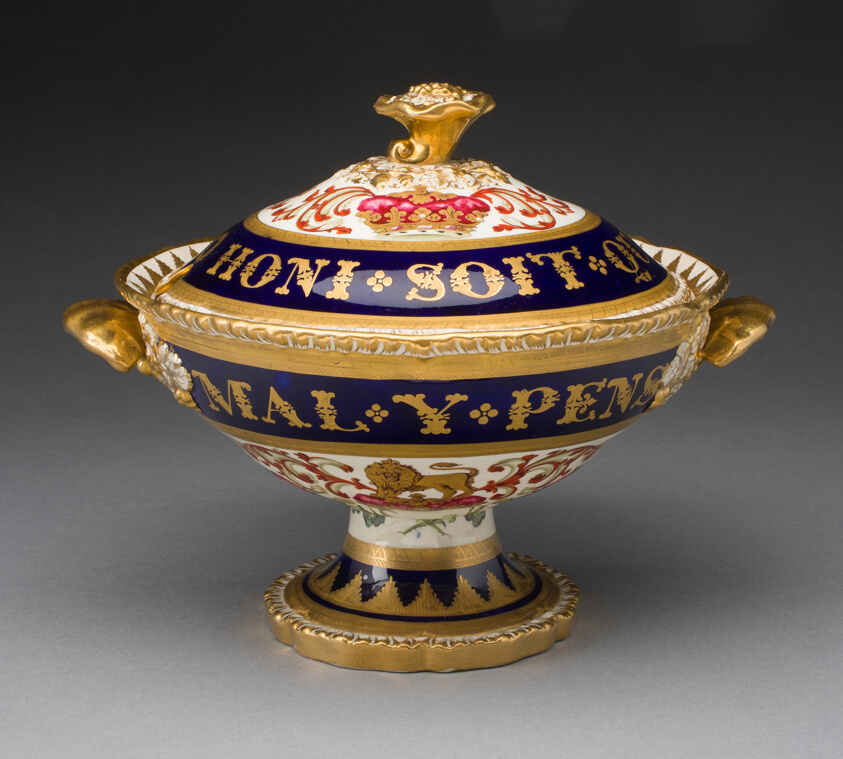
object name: Ceramics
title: Covered Cream Bowl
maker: Henry & Richard Daniel; English, 1822-46; Retailed by Mortlock China Co.; English, 1746-1896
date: c. 1820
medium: Soft-paste porcelain, polychrome enamels and gilding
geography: London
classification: vessel for serving food; dish (vessel); european decorative arts; ceramics